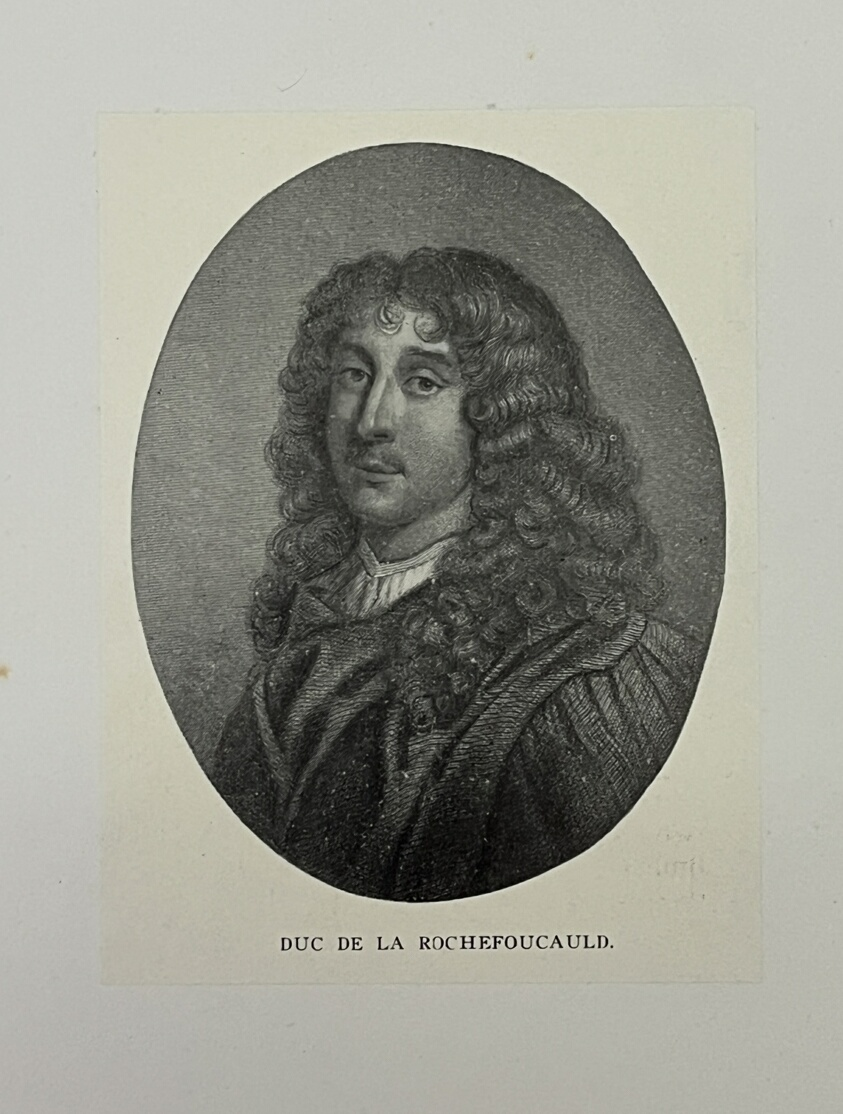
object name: Print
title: Duc de la Rochefoucauld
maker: Artist Unknown (Likely American or British, 19th century)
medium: Photolithograph on paper laid on paper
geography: United States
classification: reproduction; print; prints and drawing